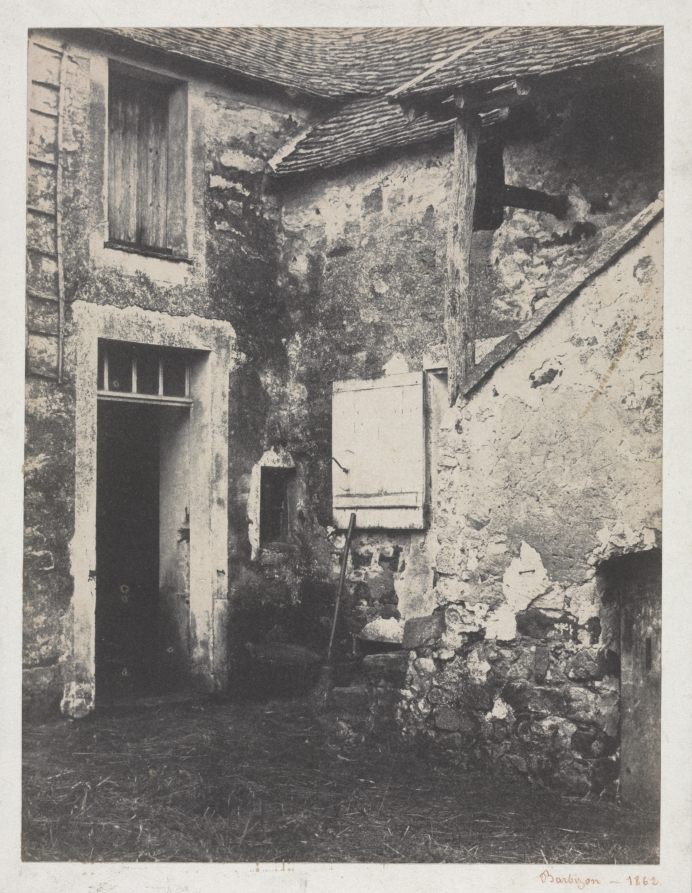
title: Farmyard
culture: France, 19th century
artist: Eugène Cuvelier (French, 1837–1900)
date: 1862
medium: Salted paper print from a paper negative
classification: Photograph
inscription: Written in red pencil lower right corner of recto: "Barbizon-1862"